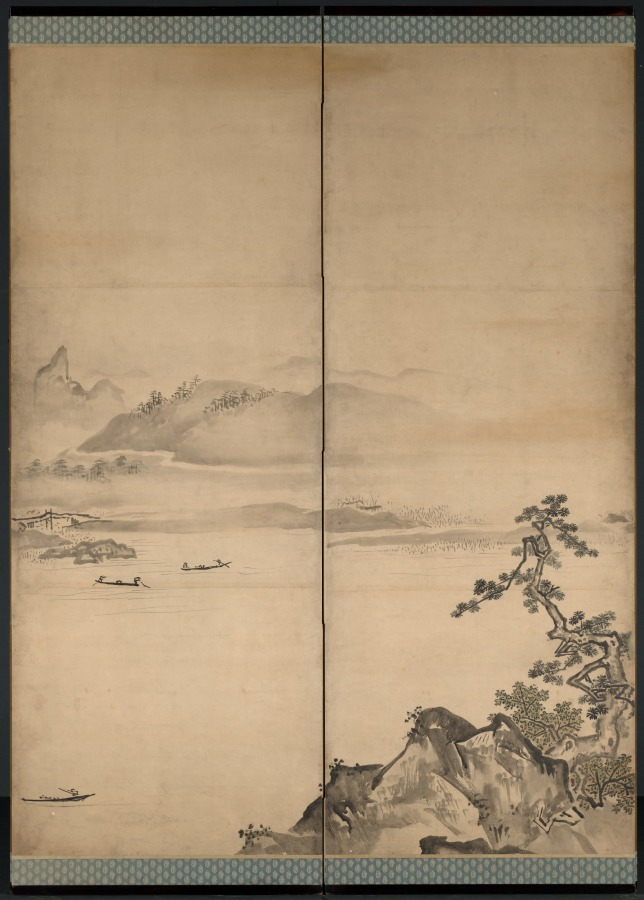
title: The Four Seasons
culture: Japan, Edo period (1615–1868)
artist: Kano Tan’yū (Japanese, 1602–1674)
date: 1668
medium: Six-panel folding screen, ink and slight color on paper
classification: Painting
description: Tan'yū's skills were honed early within the regimen of the Kano family's painting studio. His grandfather, Eitoku (1543–1590) was the Momoyama period's most sought-after painter, a champion of colorful, large-scale painting compositions who worked for several of the country's most powerful leaders. When the young Tan'yū was summoned to Edo in 1617 by the shogun to become a member of the new capital's official painting studio, few opportunities to work on similarly ambitious projects existed. Yet by the end of his career, Tan'yū had supervised the execution and installation of linked mural painting compositions in several of Japan's most prestigious residences and castles. As an official court painter to the first shogun, Tokugawa Ieyasu (reigned 1603–5), and then his successors, Tan'yū appears to have successfully juggled his official duties with private activities as a teacher, as the era's leading connoisseur of classic Chinese and Japanese painting, and as a practicing artist. His surviving compositions as well as thousands of sketches far surpass the oeuvre of any of his contemporaries. While studio assistants surely contributed to his oeuvre, just as later imitators consciously confused his accomplishments, a clearer image of the painter has emerged in recent years that better conforms with his contemporary acclaim as recorded in seventeenth- and eighteenth-century documents. Tan'yū can now be seen as an artist adept in virtually all traditional ink painting subject matter, which he often presented in novel interpretations. Equally important are his rare screen (byōbu) compositions executed in a pure yamato-e manner with vivid mineral pigments on a gold-foil background. This pair of byōbu presents Tan'yū's more orthodox approach to academic ink painting methods embracing Chinese themes that had been interpreted by numerous Japanese ink painters over the centuries. Thus a typical view of residences and human activities set along the shores of an impressive river (or lake) is enlivened by the Japanese proclivity for including seasonal references. Proceeding from right to left, the viewer passes sequentially from spring to the snow-laden branches of winter. Tan'yū lends considerable atmospherics to the panorama in his use of misty cloud banks, frequently set off by sharp, darkened ink lines or whole areas of ink washes of variegated tonalities. The spring and summer views are particularly notable in this regard, as is the presence of the artist's signature on both byōbu, attesting to their completion in Tan'yū's sixty-seventh year (1668)—50 years after he left Kyoto for the capital, and 30 years following his adoption of the artist name "Tan'yū" (in 1635). From 1622, when he began work on the mural paintings for Edo castle (the shogun's formal residence), through the completion of the painting cycle in 1636 for the Tokugawa family mausoleum in Nikkō to the north of Edo, Tan'yū's skills as head of an accomplished painting studio as well as a master painter found their most impressive expression in large-scale compositions. In 1638 he received the honorary Buddhist title Hōgen (Eye of the Law). It is intriguing therefore that relatively few independent byōbu paintings from the master's hand survive, particularly documented early works.